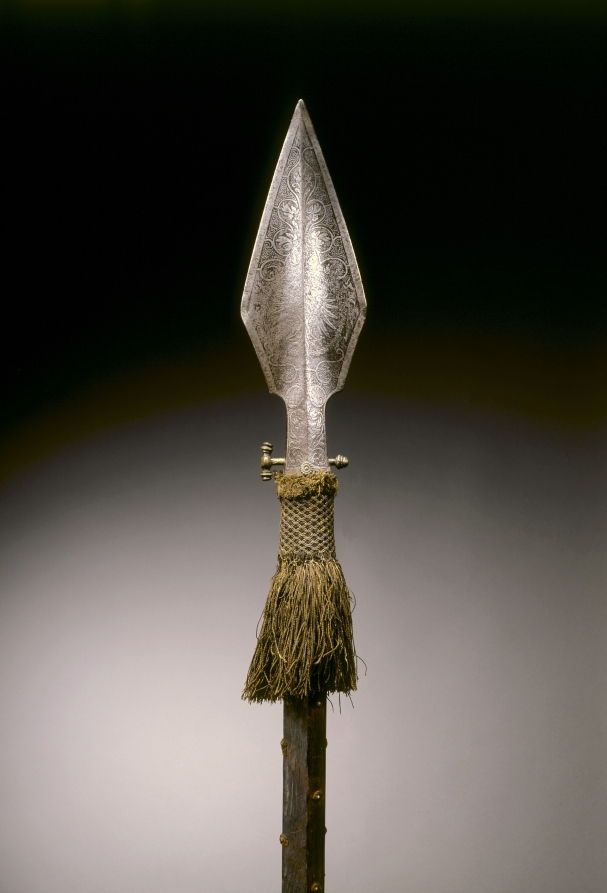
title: Parade Spear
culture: Germany, Augsburg?, 16th century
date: c. 1570–1600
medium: steel, etched; brass lugs; hexagonal wood haft with leather straps; woolen tassel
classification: Arms and Armor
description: This weapon is etched with the imperial Habsburg arms on one face and the Burgundian stave cross of St. Andrew on the other. In the 1500s, parade spears of this type became part of the insignia of infantry and light cavalry officers in the imperial army. In 1548 Titian painted an equestrian portrait of Emperor Charles V holding such a spear. At his abdication in 1556, Charles split the Habsburg inheritance between his son, Philip II of Spain, who was awarded control of Burgundy, and his brother, Frederick, who received the imperial title and the family's central European lands. This spear probably belongs to this later period and its purpose was likely ceremonial.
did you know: The Habsburg coat of arms, seen here, features a double-headed eagle.